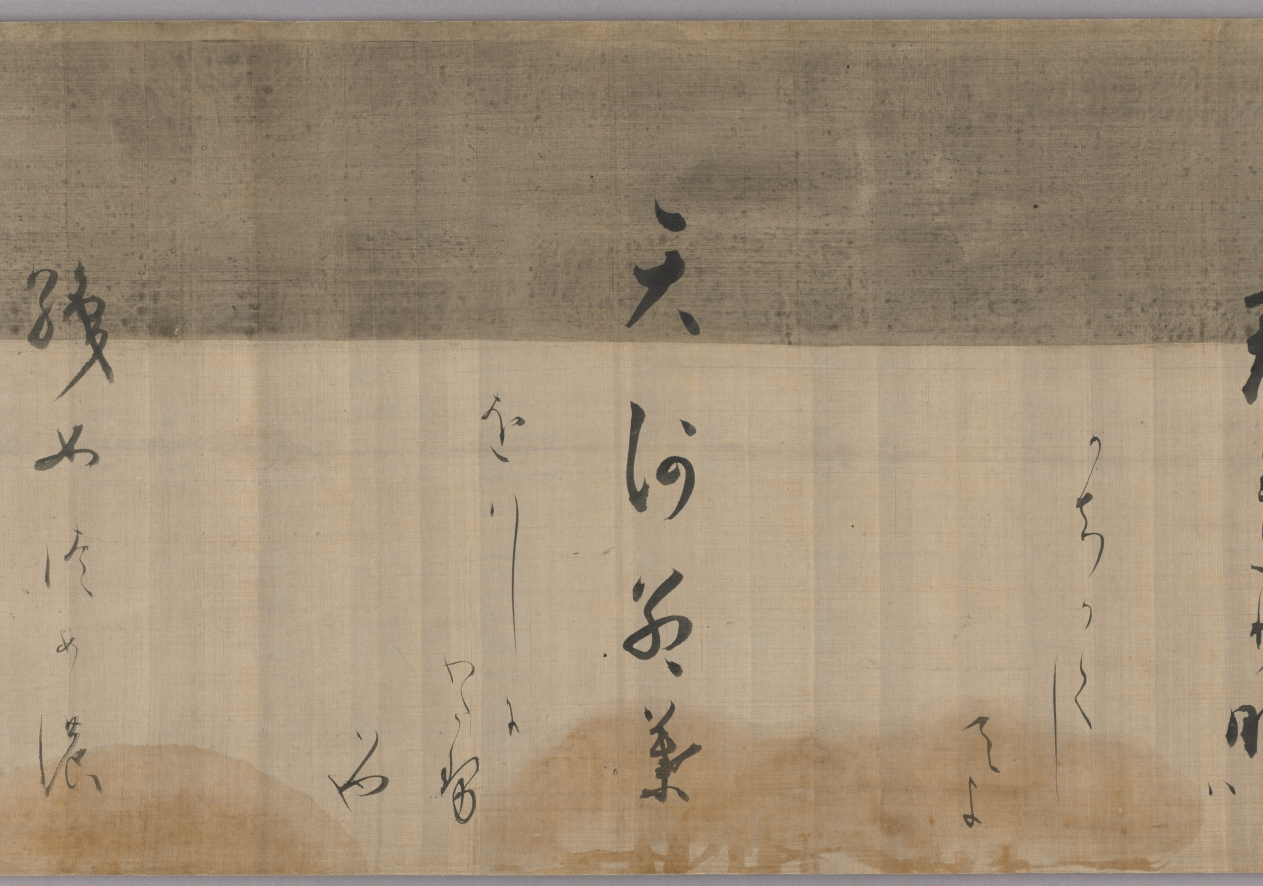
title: Selections from the Collection of Japanese Poems from Ancient and Modern Times (Kokin wakashū) with Design of Pines Along the Shore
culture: Japan, Momoyama period (1573-1615) to Edo period (1615-1858)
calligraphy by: Hon'ami Kōetsu (Japanese, 1558–1637)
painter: attributed to Tawaraya Sōtatsu (Japanese, c. 1570–c. 1640)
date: 1600s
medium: handscroll; ink on silk with gold and silver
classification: Calligraphy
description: The calligrapher and craftsman Hon’ami Kōetsu frequently collaborated with Tawaraya Sōtatsu, a painter who ran a studio that produced fans and screens. Sōtatsu’s work featured abstracted and flattened shapes, fields of color and gold, and asymmetry. In particular, motifs that appeared in small scale, such as flora and fauna, in early decorated Japanese papers were painted in a larger scale—blown up as if seen under a magnifying glass. For this handscroll, Kōetsu brushed poems from the autumn section of a poetry anthology onto silk with a landscape of pines in gold and silver likely painted by Sōtatsu.